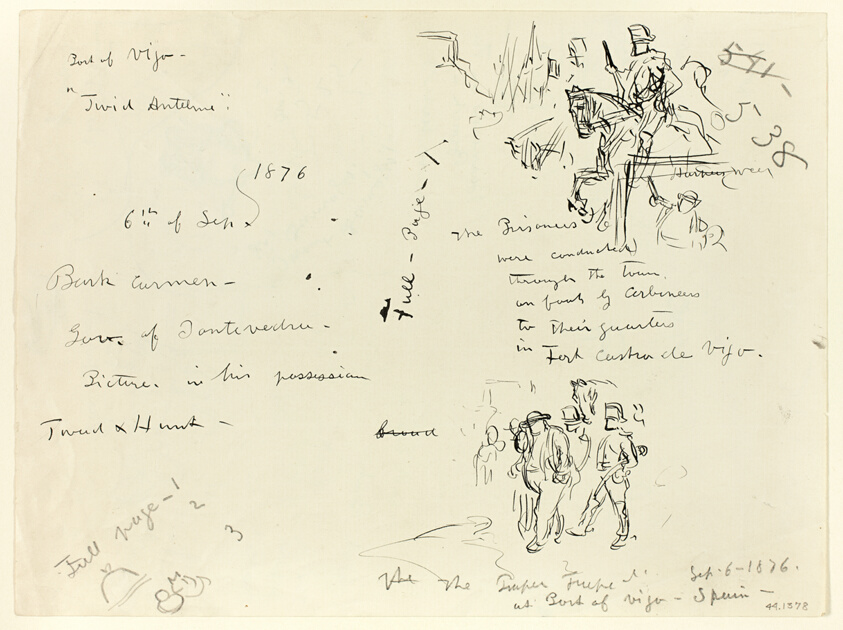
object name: Drawing and Watercolor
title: Sheet of Sketches: Soldier on Horseback and Soldier with Sabre Conduting Prisoner (recto); Sheet of Sketches (verso)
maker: Thomas Nast (American, 1840-1902)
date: 1876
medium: Pen and black ink (recto) and graphite (verso) on ivory laid paper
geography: United States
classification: pen and ink drawings; drawings (visual works); prints and drawing; graphite; paper